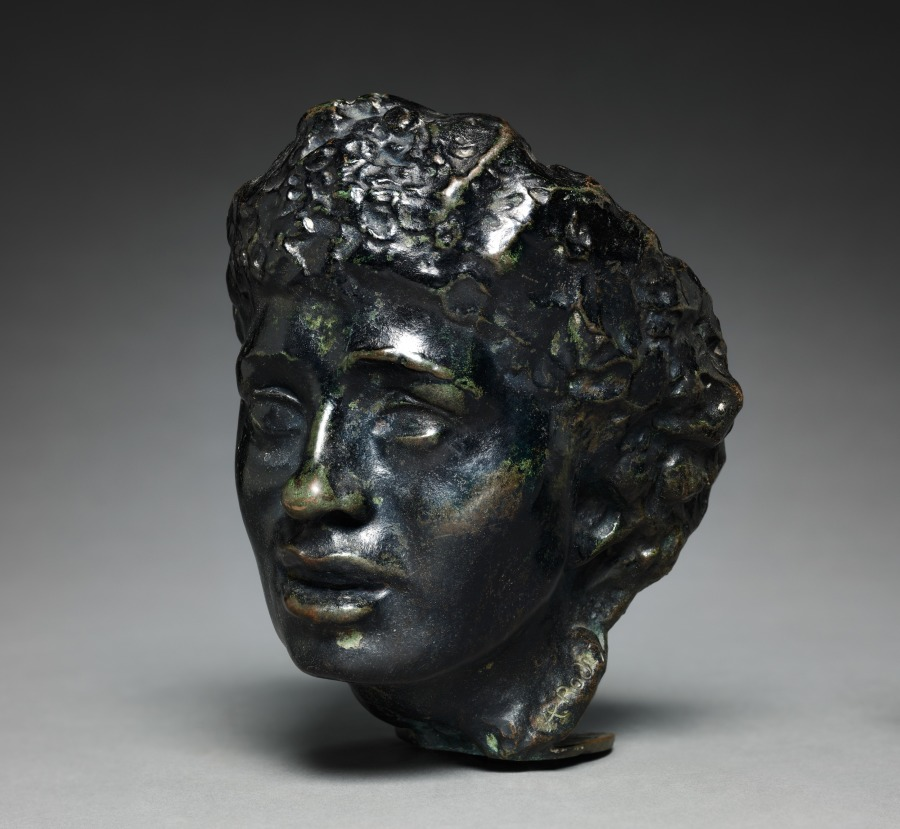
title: Mask of Séverine (Caroline Rémy)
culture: France, 19th century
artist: Auguste Rodin (French, 1840–1917)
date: 1893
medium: bronze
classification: Sculpture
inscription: Signed sinister side of neck: "A. Rodin"; inside dexter side in relief: "A. Rodin"